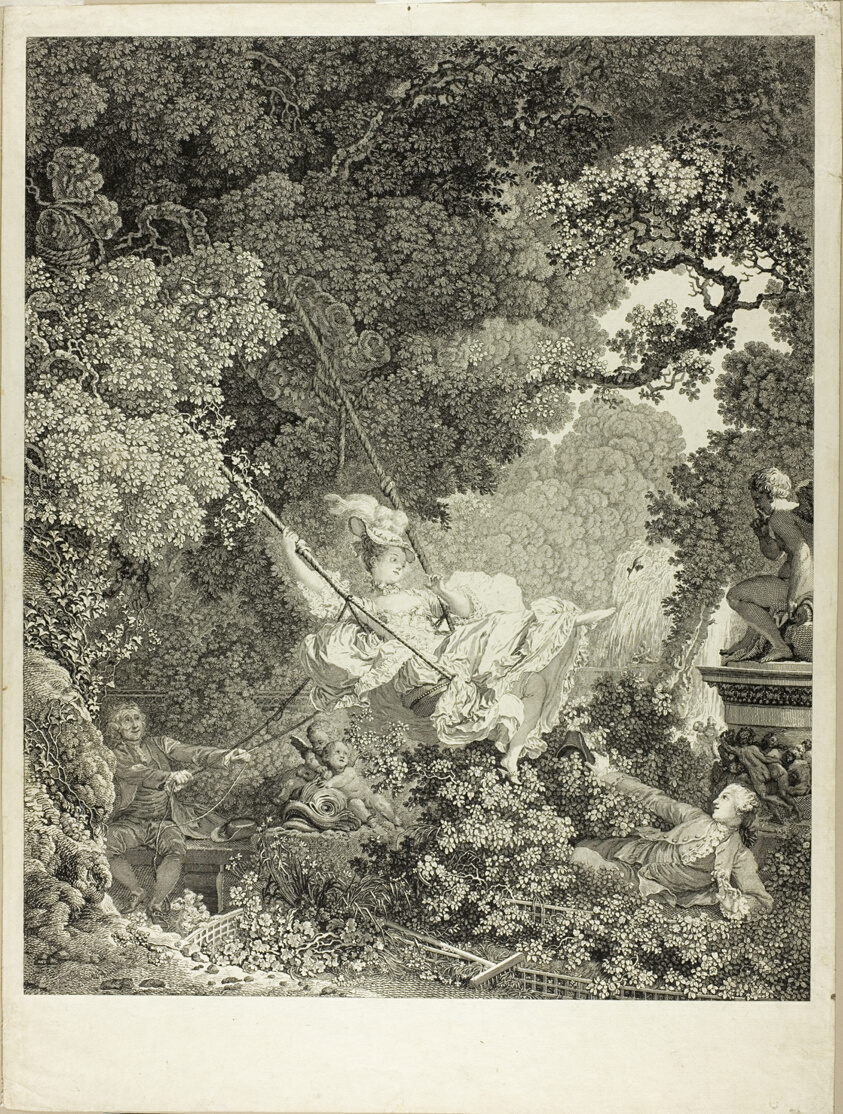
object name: Print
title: The Happy Accident of the Swing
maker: Nicolas Delaunay (French, 1739-1792); after Jean-Honoré Fragonard (French, 1732-1806)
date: 1792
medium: Engraving in black ink on ivory laid paper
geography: France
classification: engraving; print; prints and drawing